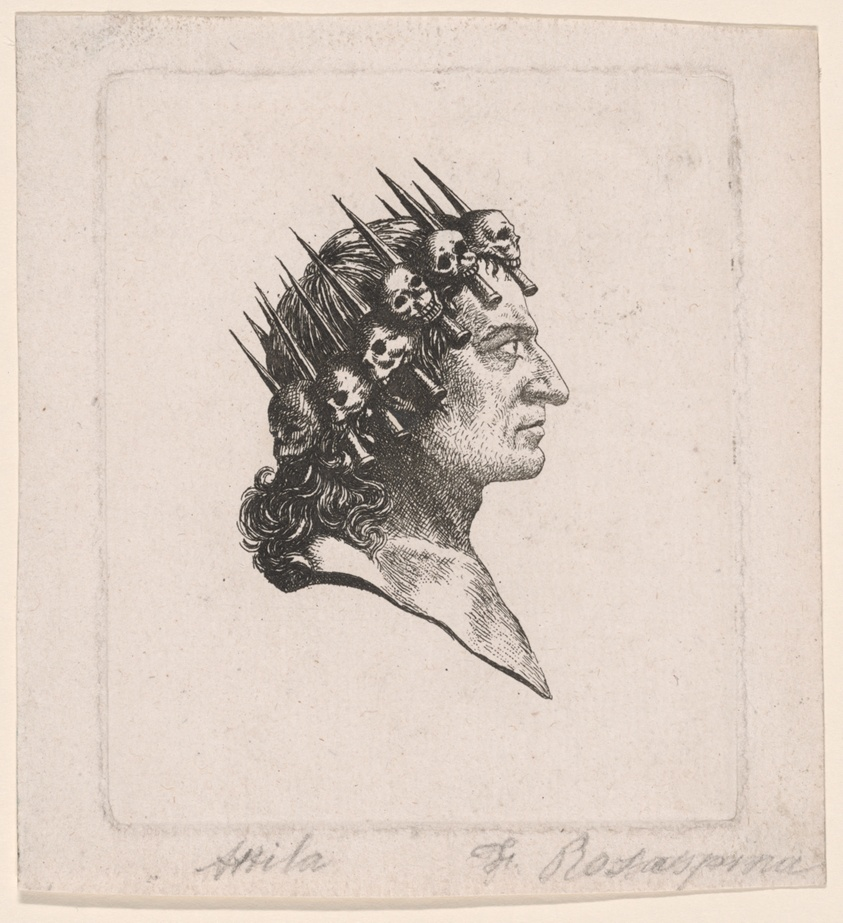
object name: Print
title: Portrait of Le Roi Marat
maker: Unknown artist, possibly “Viller”; probably French, active c. 1790–1800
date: c. 1795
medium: Etching in black on ivory laid paper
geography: France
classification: print; etching; paper; prints and drawing